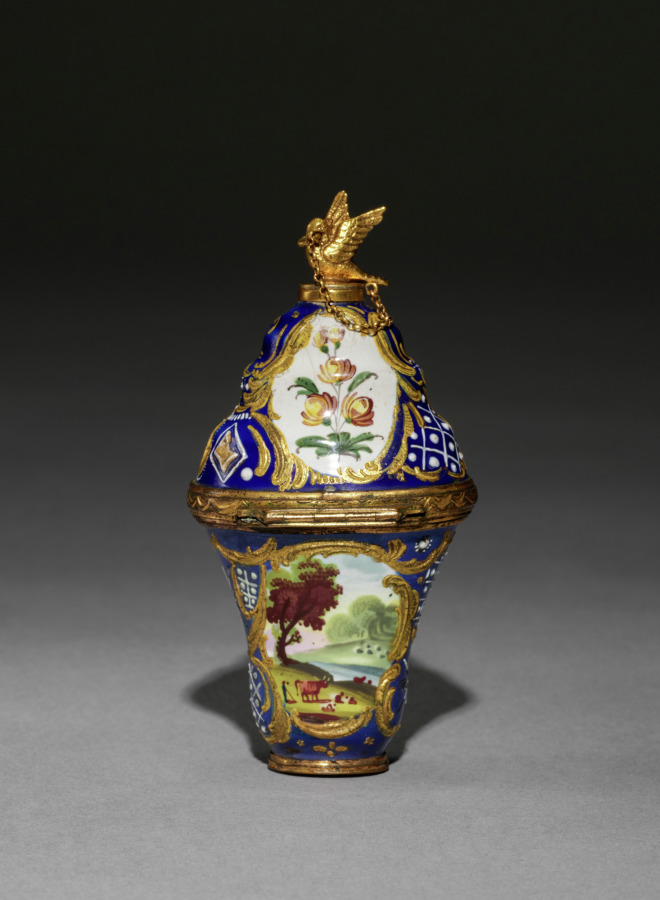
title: Scent Bottle and Box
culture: England, Staffordshire, 18th century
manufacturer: Staffordshire Factory (British)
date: 1750–1775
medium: enamel on copper with metal mounts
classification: Miscellaneous